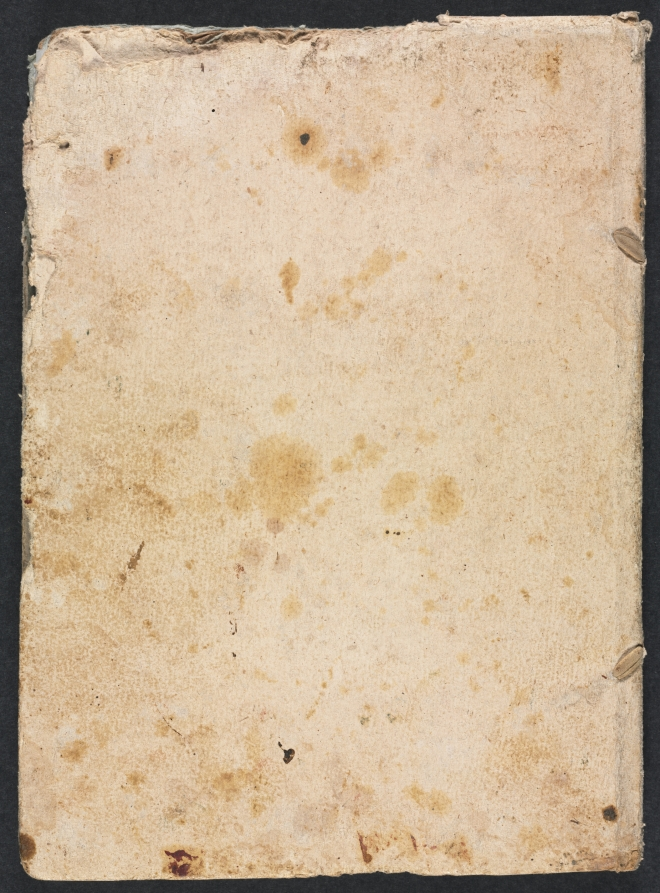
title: Verona Sketchbook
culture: Italy, 18th century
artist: Francesco Lorenzi (Italian, 1723–1787)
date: 1760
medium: chalk drawing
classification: Bound Volume